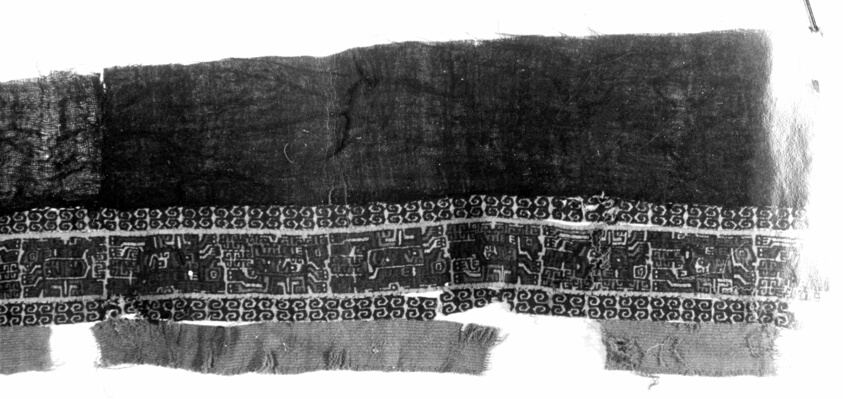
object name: Textile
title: Fragment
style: nazca, andean, andes, Pre-Columbian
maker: Nazca-Wari; Peru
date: A.D. 700/900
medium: Slit tapestry and plain cloth; applied plain border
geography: Peru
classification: textile; weaving